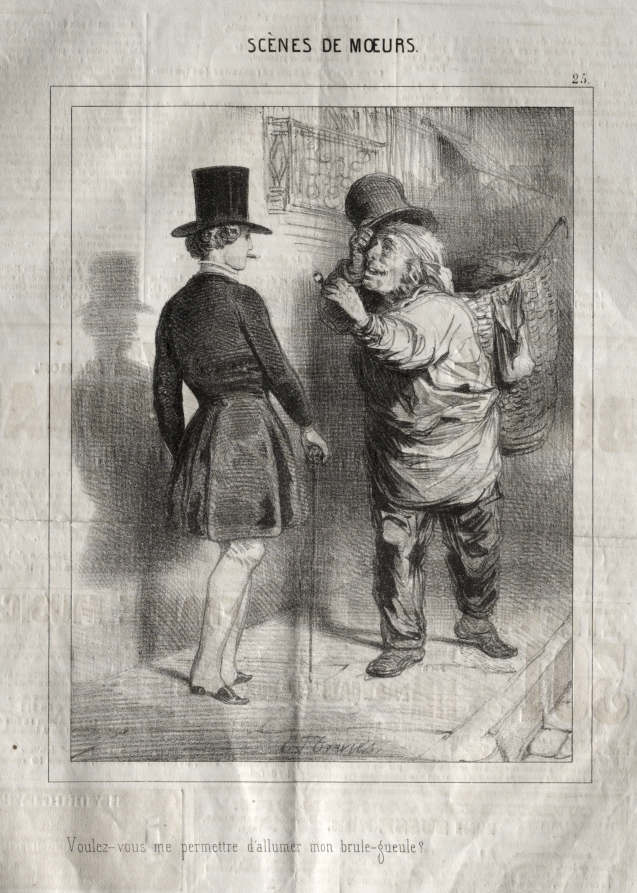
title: Scènes de Moeurs: Voulez-vous me permettre d'allumer mon brule-gueule?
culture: France, 19th century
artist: Charles Joseph Traviès de Villers (French, 1804–1859)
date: c. 1830–45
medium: lithograph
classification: Print